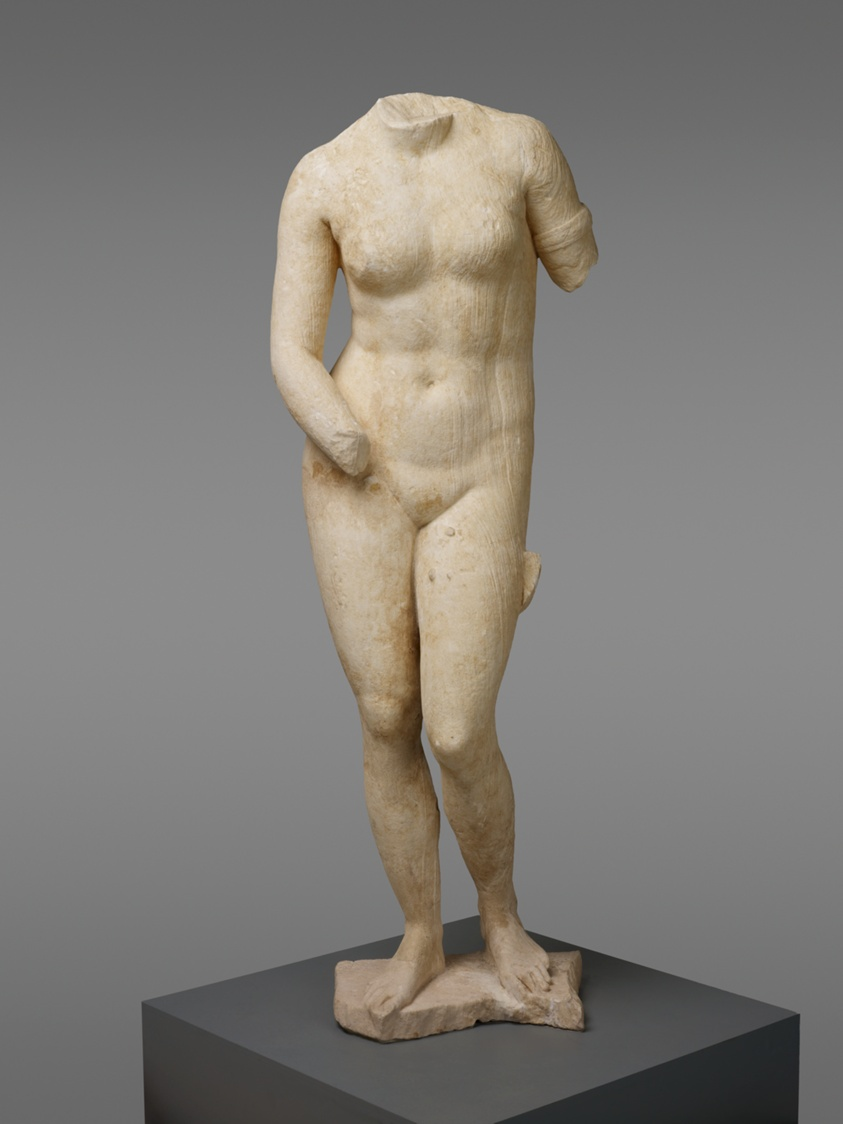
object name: Sculpture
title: Statue of the Aphrodite of Knidos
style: Classical, imperial (roman), ancient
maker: Roman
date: 2nd century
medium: Marble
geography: Roman Empire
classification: sculpture; marble; stone; ancient art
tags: mythology, goddesses, gods (deities)